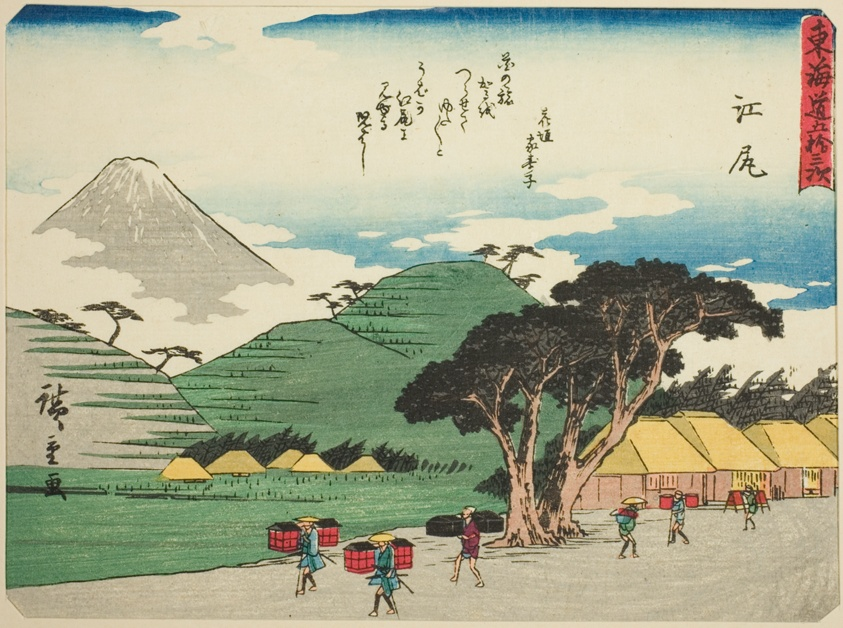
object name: Print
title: Ejiri, from the series "Fifty-three Stations of the Tokaido (Tokaido gojusan tsugi)," also known as the Tokaido with Poem (Kyoka iri Tokaido)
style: Japanese (culture or style)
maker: Utagawa Hiroshige 歌川 広重; Japanese, 1797-1858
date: c. 1837/42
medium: Color woodblock print; chuban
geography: Japan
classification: woodblock print; print; asian art